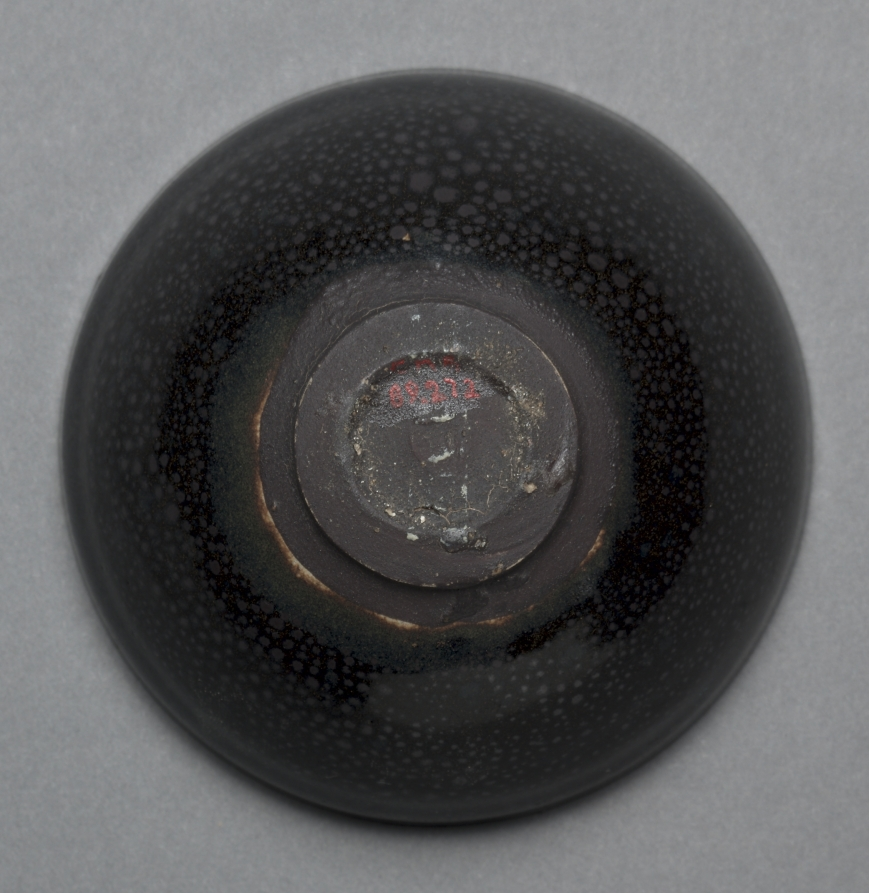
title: Tea Bowl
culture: Northern China, Henan province, Northern Song dynasty (960-1127) or Jin dynasty (1115-1234)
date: 1100–1200s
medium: stoneware with "oil spot" glaze, black ware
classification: Ceramic